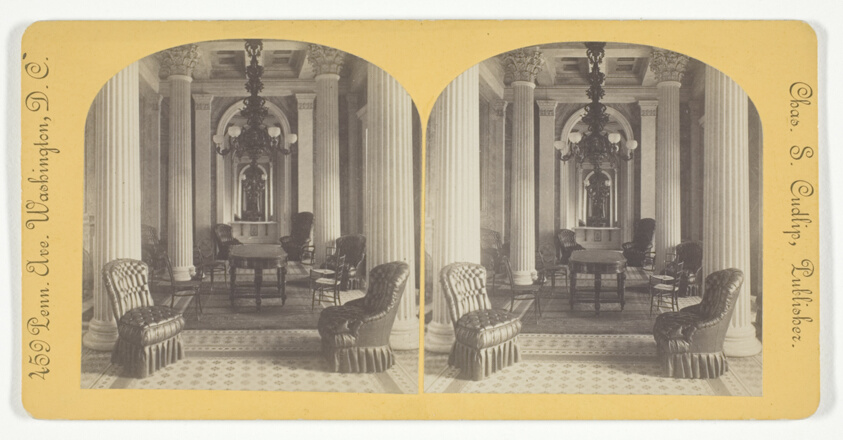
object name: Photograph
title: Marble Room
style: 19th century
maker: Chas. S. Cudlip (American, active late 19th century)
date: Late 19th century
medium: Albumen print, stereo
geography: Washington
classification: photography; photograph; albumen silver print; stereograph (albumen)